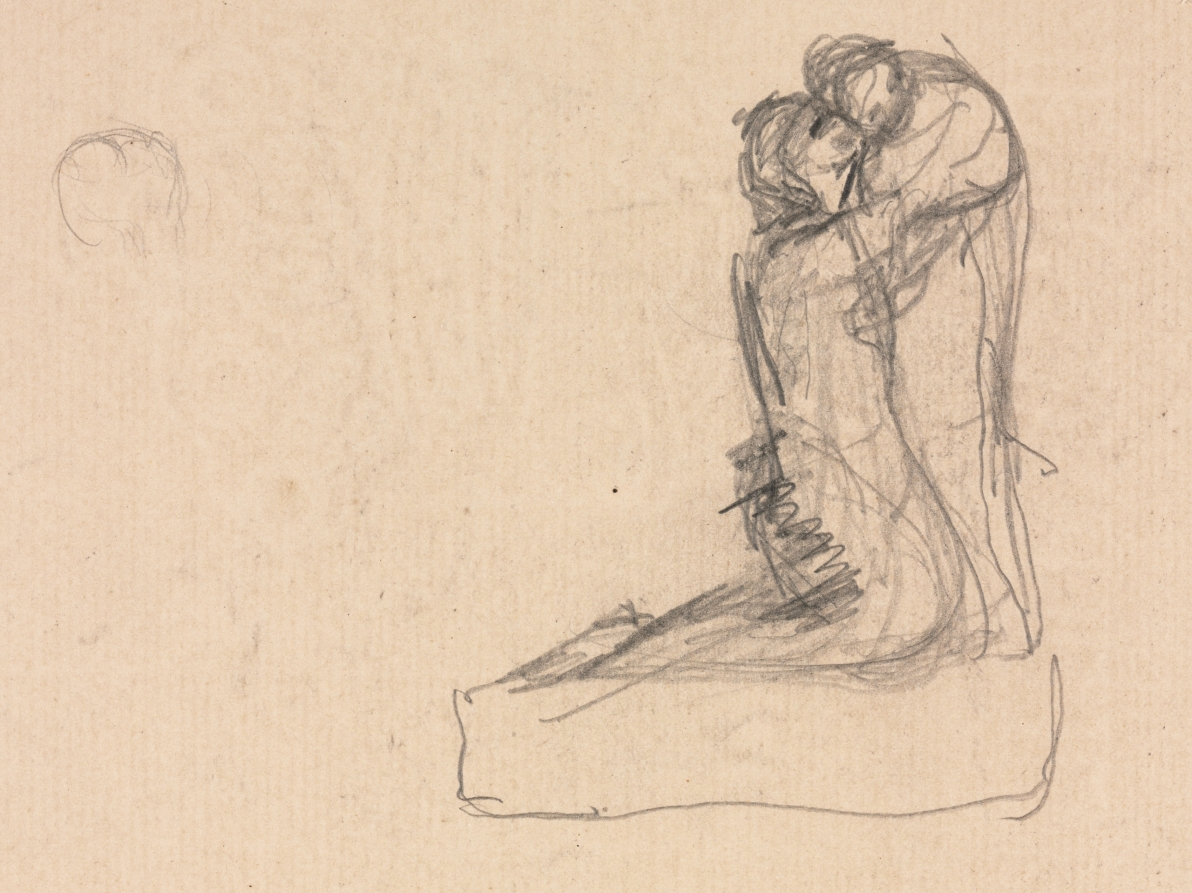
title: Sketch of Two Figures Embracing (verso)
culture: France, 19th century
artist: Théodule Ribot (French, 1823–1891)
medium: graphite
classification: Drawing